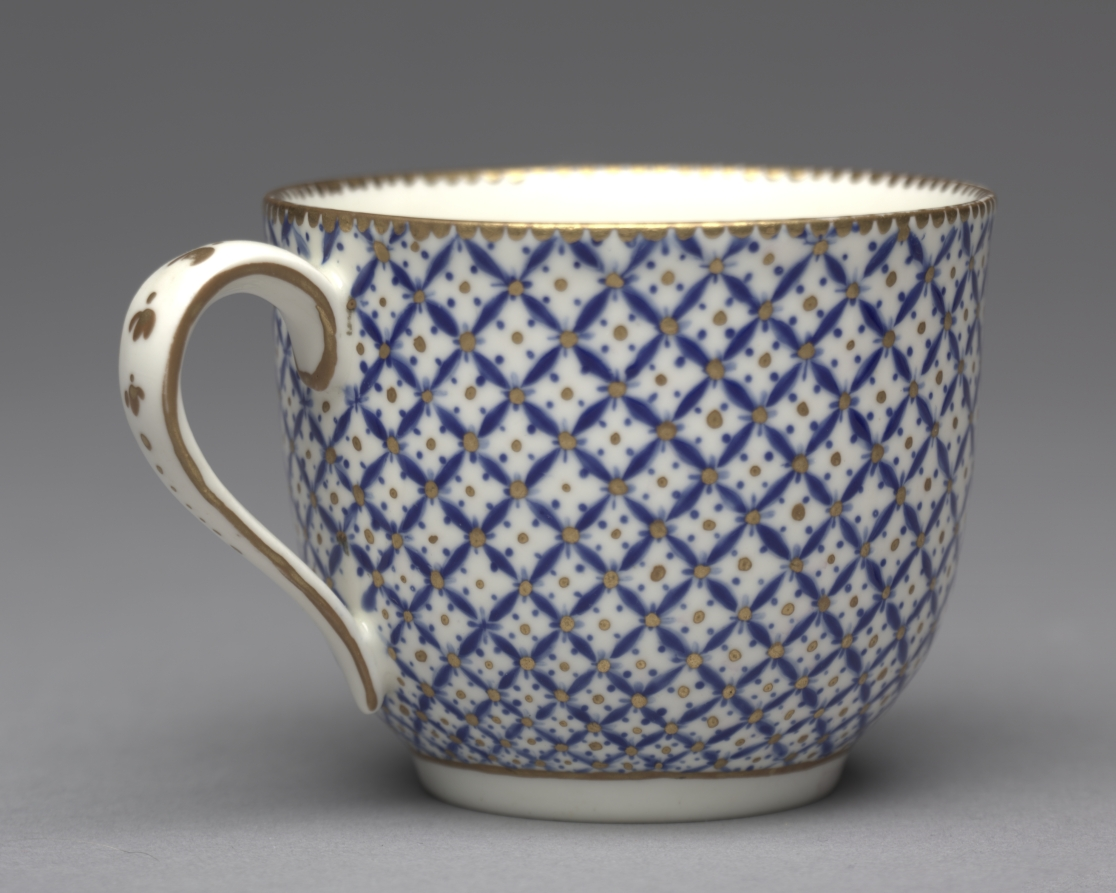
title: Cup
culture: France, Chantilly, 18th century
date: c. 1760–1770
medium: porcelain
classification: Ceramic